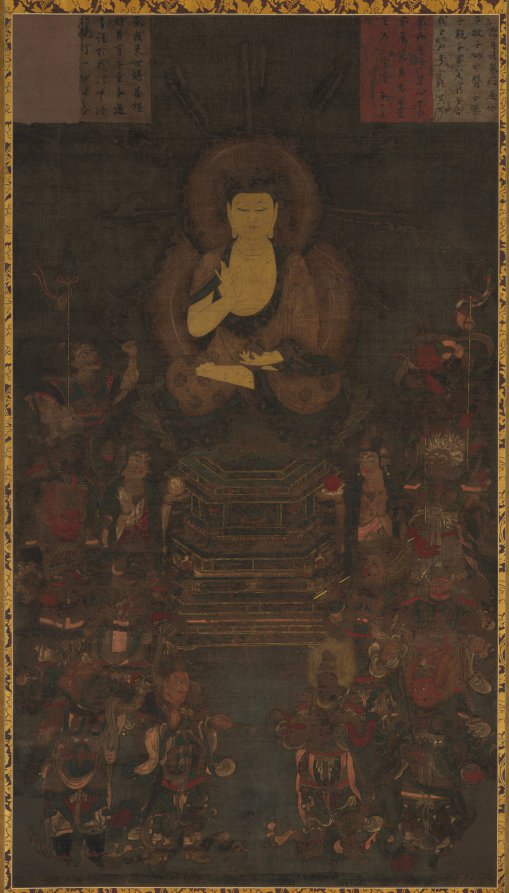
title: Medicine Master Buddha and the Twelve Divine Generals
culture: Japan, Kamakura period (1185–1333)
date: 1200s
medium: Hanging scroll painting; ink, color, gold, and silver on silk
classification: Painting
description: From the 700s, people in Japan began praying to the Medicine Master Buddha (Yakushi Nyorai) for longevity. Yakushi is at the center of this image, flanked by the bodhisattvas of the sun and moon, Nikkō and Gakkō. The Twelve Divine Generals, a group of protective deities, surround him. Yakushi sits in a meditative pose with his right hand in a gesture bestowing fearlessness while his left hand holds a medicine jar. In the upper part of the painting, rectangles simulating decorative paper inscription slips contain excerpts from a sacred text about Yakushi, in which he asks that sick people who speak his name should become well and that all who hear his name might have their purity restored.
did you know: Each of the Divine Generals has an identifying zodiac animal in his hair or headdress.